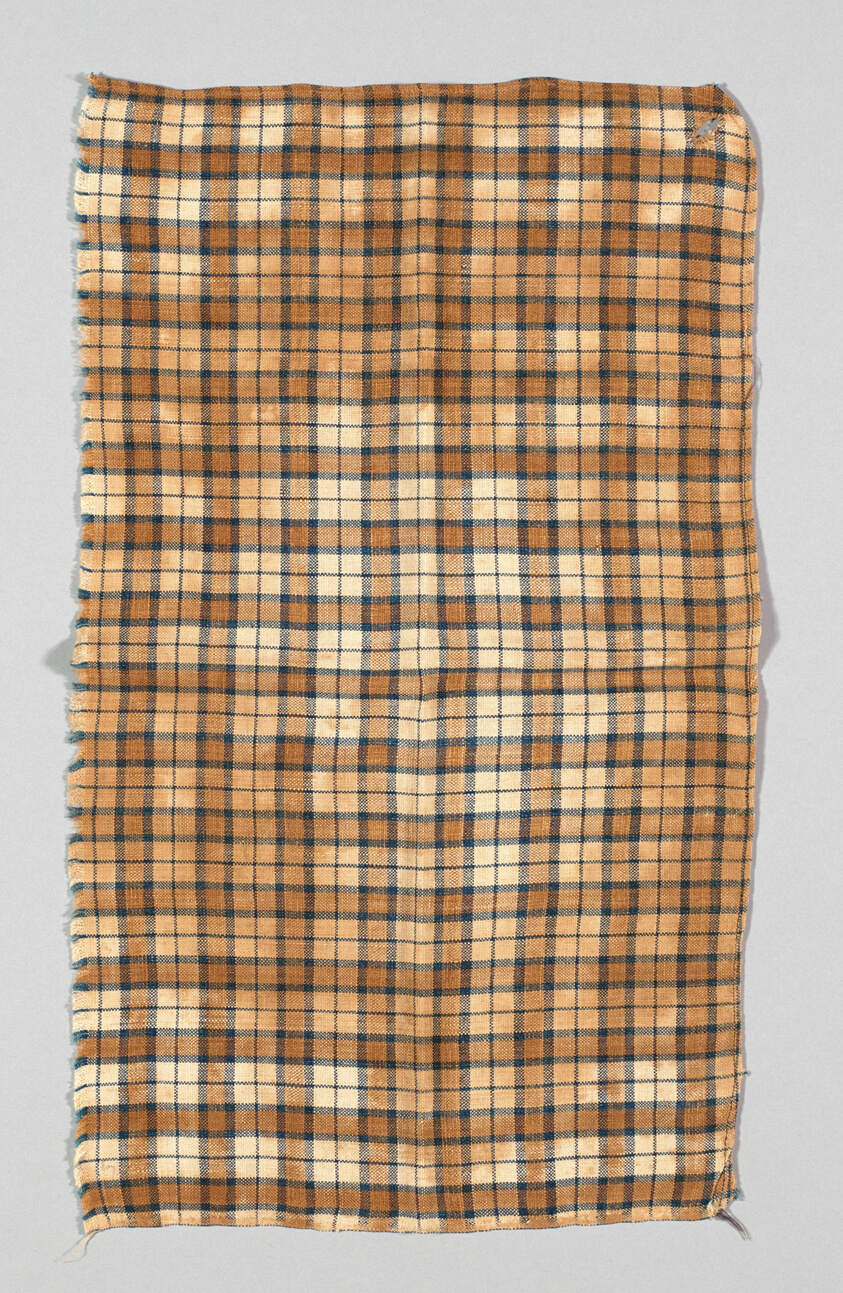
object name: Textile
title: Fragment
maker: United States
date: 1801/25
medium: Sample of stripe and check patterns of blue, white and tan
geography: United States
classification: textile; weaving